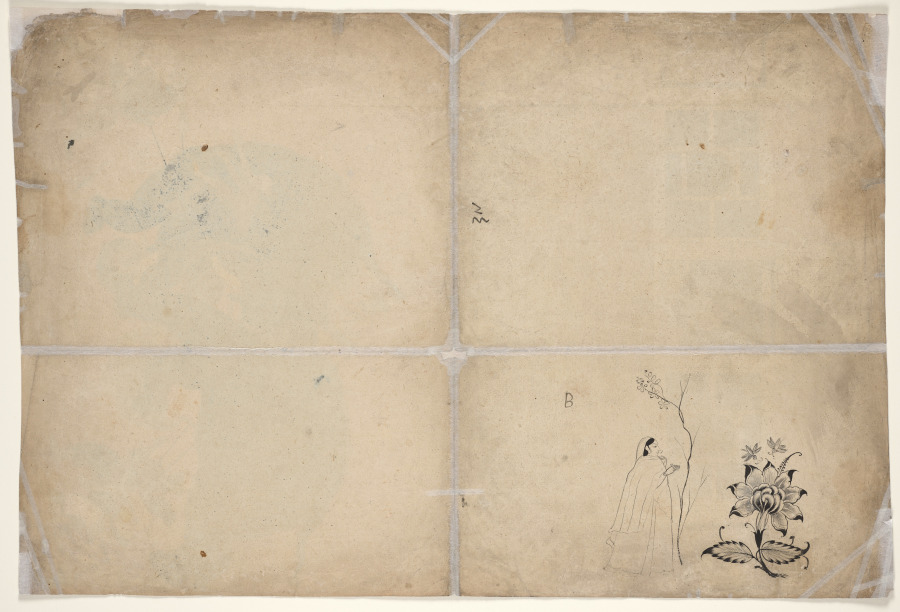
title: Two Elephants Fighting in a Courtyard Before Muhammad Shah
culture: India, Guler school, 18th century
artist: attributed to Nainsukh (Indian, 1710–1778)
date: c. 1730–40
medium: Gum tempera and ink on paper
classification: Painting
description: The Mughal emperor responsible for a revival of courtly arts and pastimes was Muhammad Shah (reigned 1719–48). This painting was made by an artist from a small kingdom in the western Himalayas who stayed at the Mughal court in Delhi and painted scenes of his experiences. Like his predecessors, Muhammad Shah enjoyed watching elephant fights. He is shown in his window of public audience, marked by a golden carpet, smoking a hookah. Women from his harem can be seen looking on from behind painted screens. Two pairs of men hold fire brands and spears to prevent the elephants from running off and to keep them under control. The intensity of the fight—captured at a moment when one mahout, or elephant trainer, has dropped his goad and is about to jump off—is augmented by the dense colors and forms in contrast to the otherwise pale planes, balanced only by the strip of palace windows.